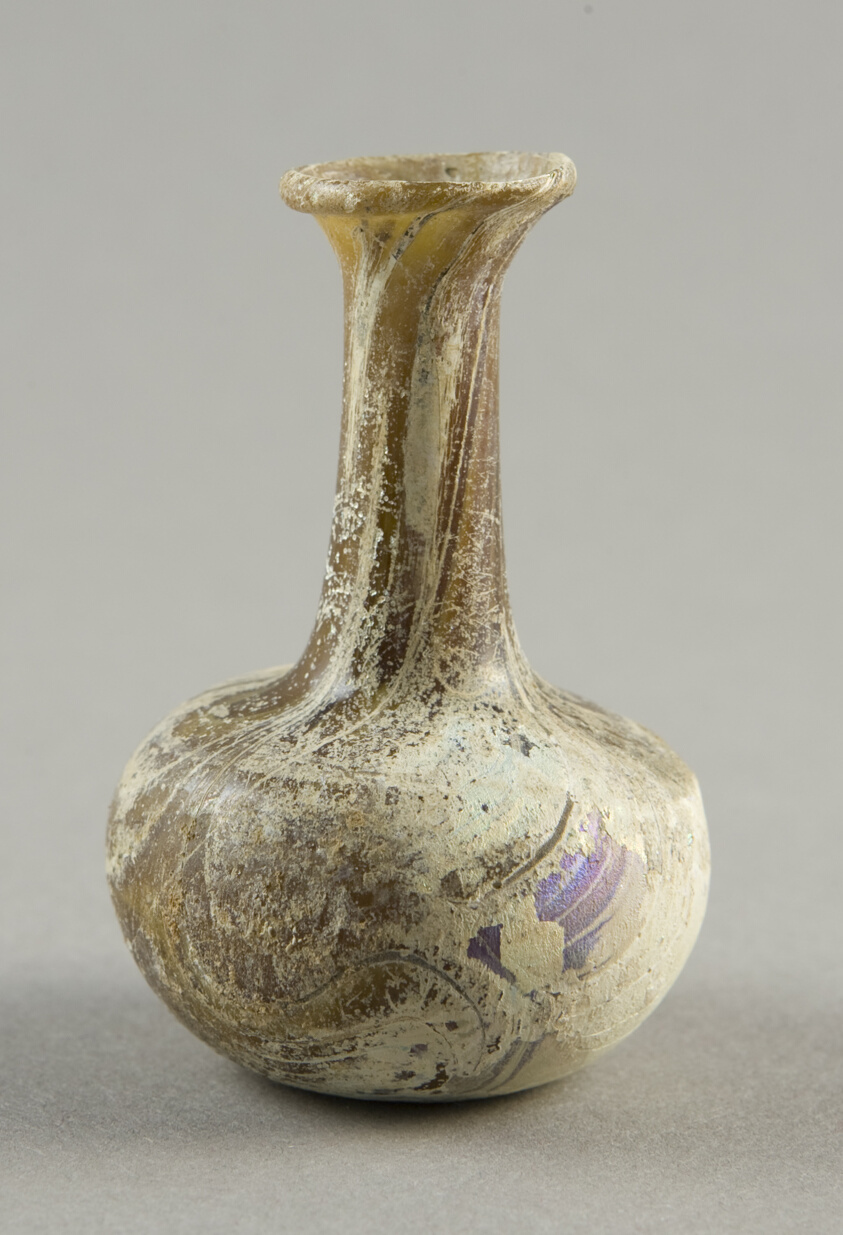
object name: Vessel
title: Bottle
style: syrian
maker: Roman; Levant or Syria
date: 1st century BCE-1st century CE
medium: Glass, blown technique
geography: Syria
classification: bottle; glass; vessel; ancient art